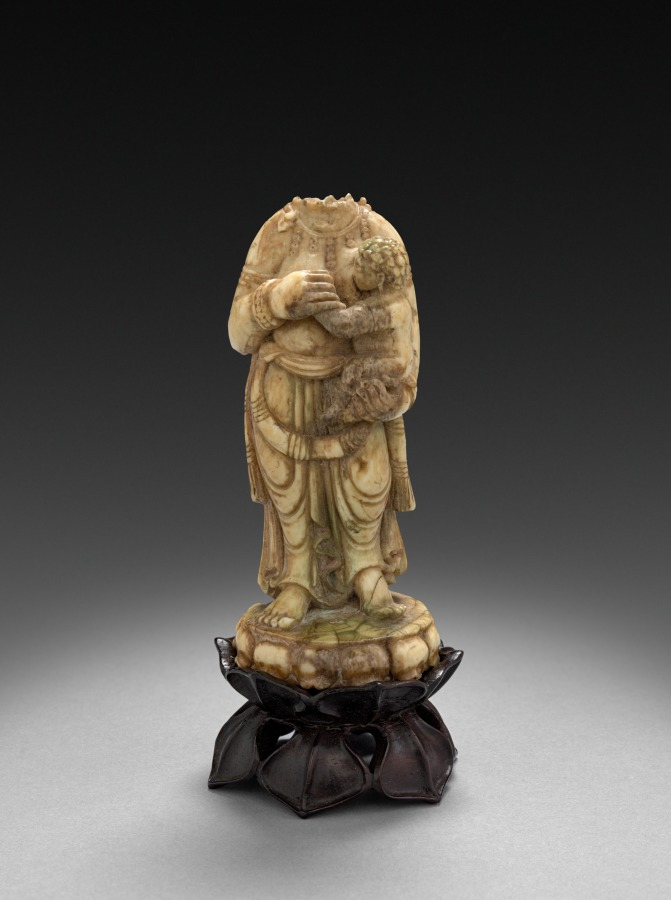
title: Hariti Statuette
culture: China, Tang dynasty (618–907)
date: 618–907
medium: ivory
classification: Sculpture